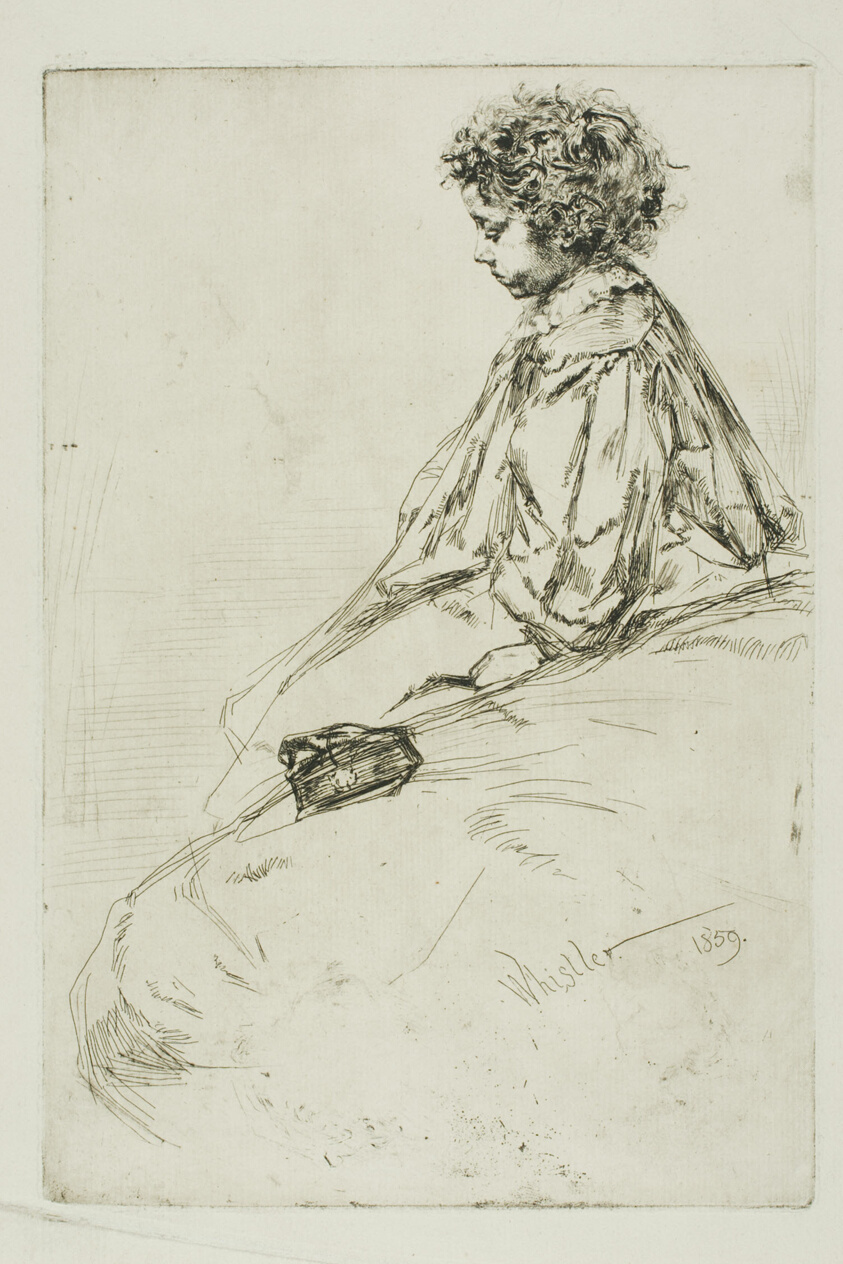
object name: Print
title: Bibi Lalouette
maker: James McNeill Whistler (American, 1834-1903)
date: 1859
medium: Etching and drypoint with foul biting in black ink on ivory laid paper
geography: United States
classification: etching; foul biting; print; prints and drawing; drypoint; paper